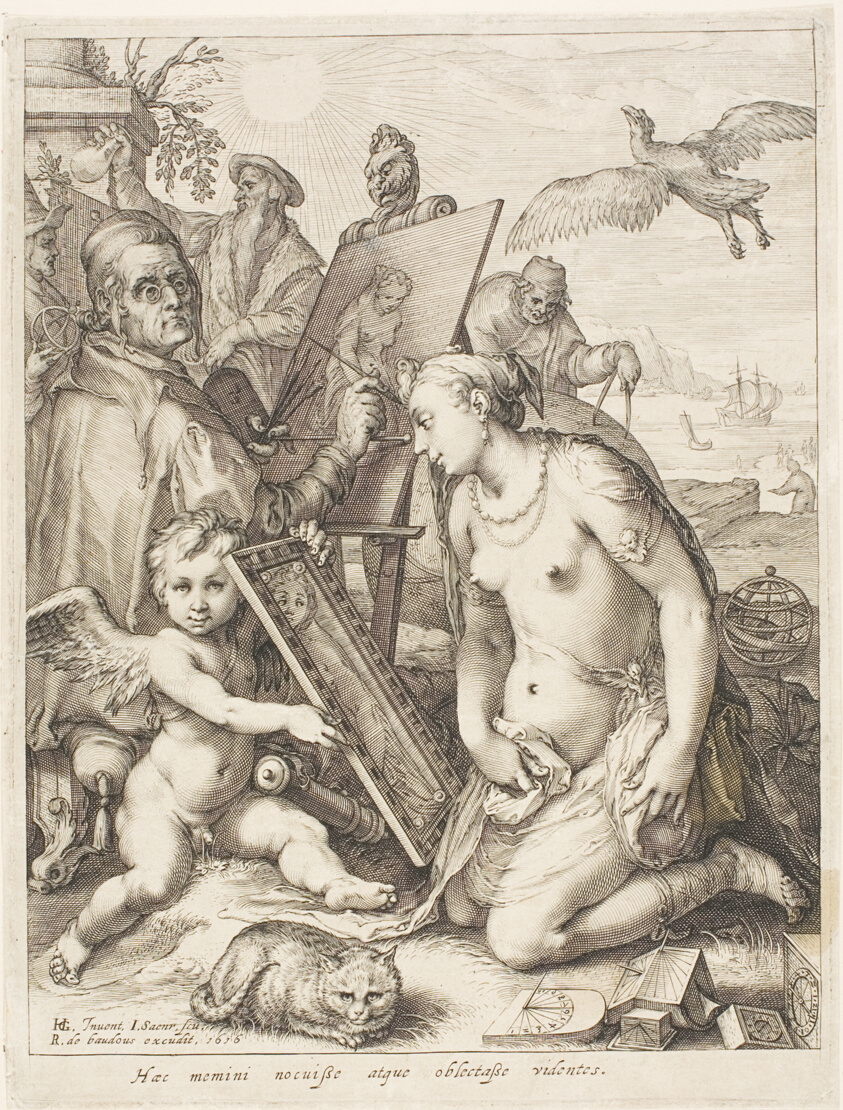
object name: Print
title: The Painter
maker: Jan Saenredam (Dutch, 1565-1607); after Hendrick Goltzius (Dutch, 1558-1617)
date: 1616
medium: Engraving on paper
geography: Netherlands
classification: engraving; print; prints and drawing